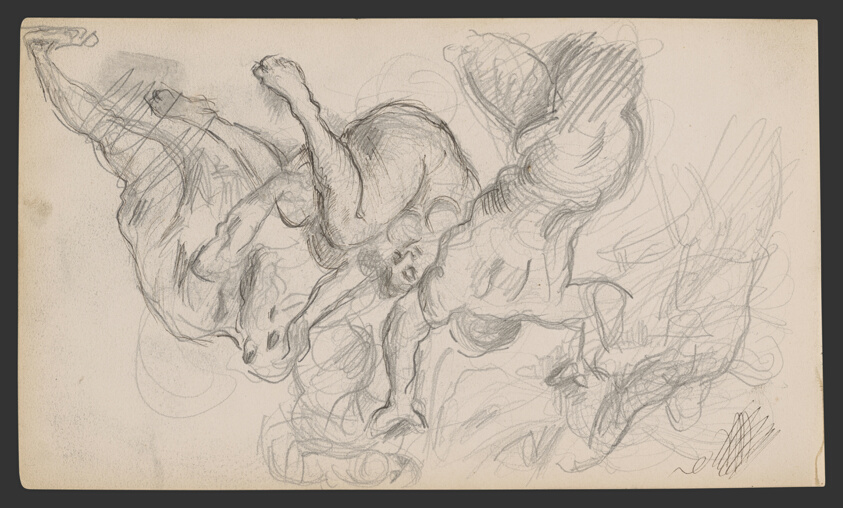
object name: Drawing and Watercolor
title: Sketchbook No. 2 (L'Estaque)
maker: Paul Cézanne; French, 1839-1906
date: 1875–86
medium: Graphite and pen and ink drawings on paper, bound into a book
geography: France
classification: sketchbook; graphite; prints and drawing; paper